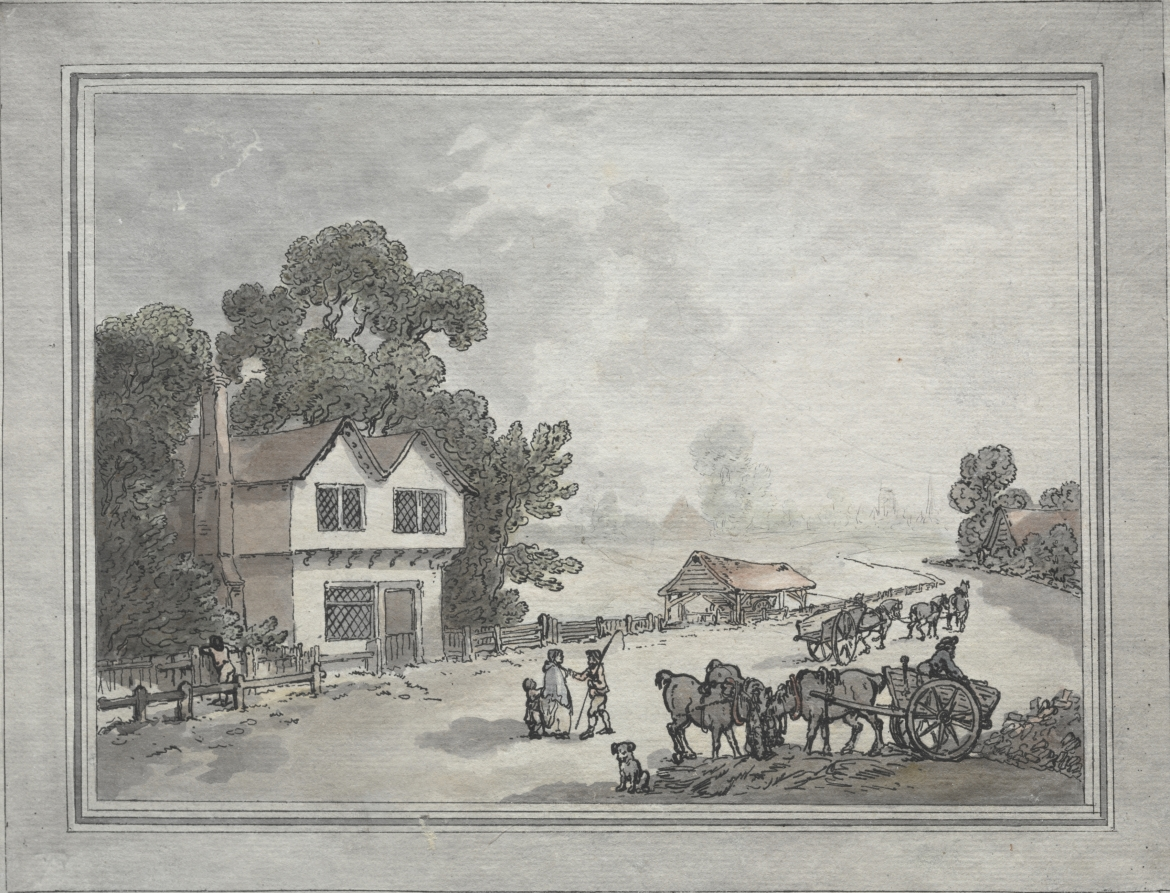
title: Horses and Carts on a Country Road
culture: England, late 18th-early 19th century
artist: Thomas Rowlandson (British, 1756–1827)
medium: etching, hand colored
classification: Print